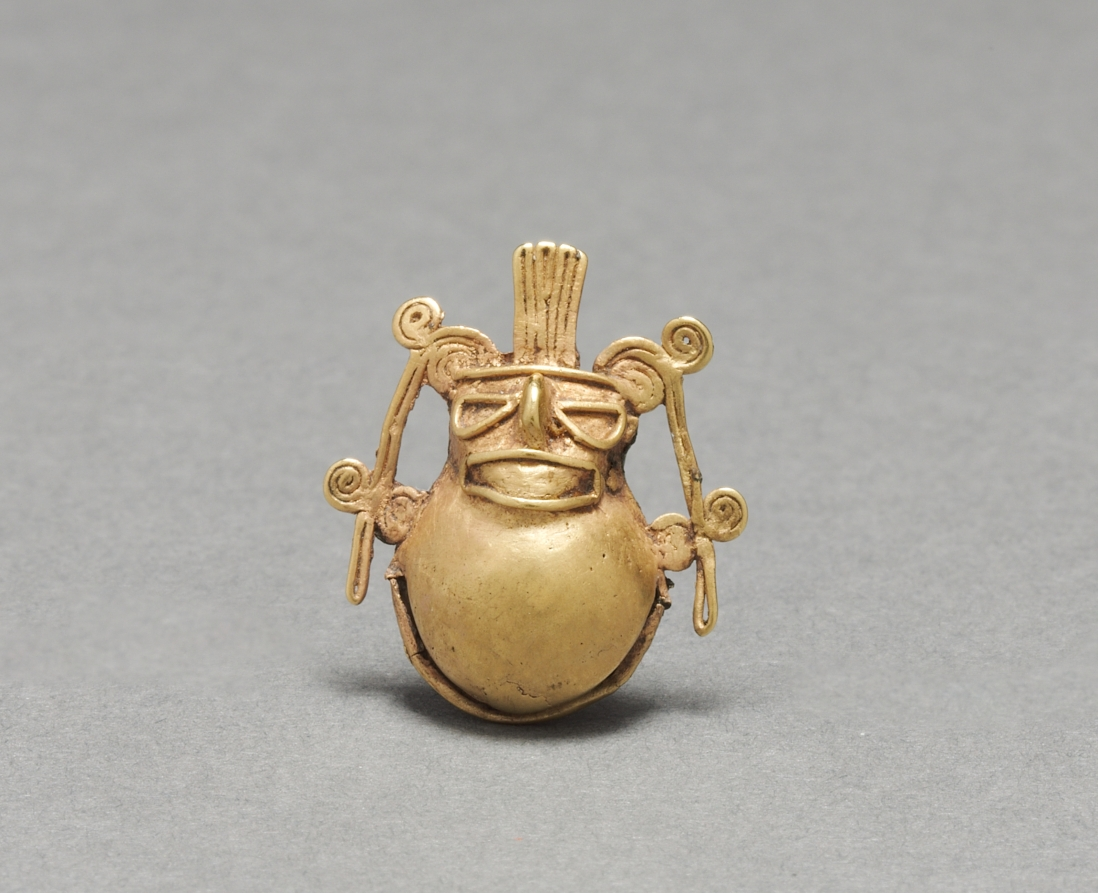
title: Figurine Bell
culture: Mexico, Mixtec, 13th-16th century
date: c. 1200–1519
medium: gold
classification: Jewelry